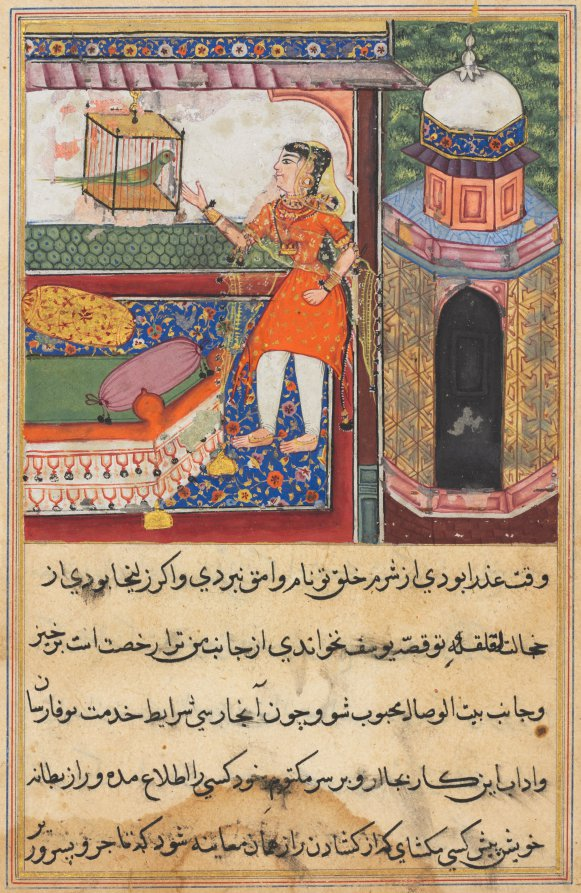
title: The Parrot Addresses Khujasta at the Beginning of the Tenth Night, from a Tuti-nama (Tales of a Parrot)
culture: Mughal India, court of Akbar (reigned 1556–1605)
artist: Iqbal (Indian, active 1550s-1590s)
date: c. 1560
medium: gum tempera, ink, and gold on paper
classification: Painting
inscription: iqbāl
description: Tuti the wise parrot begins to tell Khujasta a moralizing tale of a merchant, the son of a vizier, and a magical, wooden parrot. An inscription in the margin of this page attributes it to the painter Iqbal.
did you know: Khujasta’s large face and the rendering of her scarf are vestiges of an earlier style.